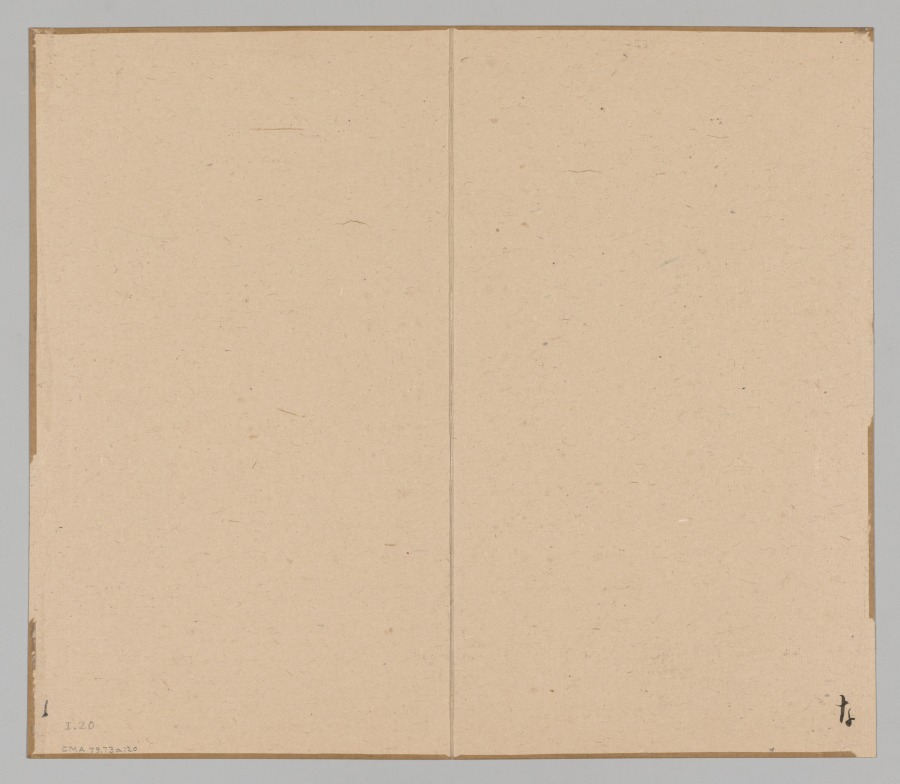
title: Reverberations of Taiga, Volume 1 (leaf 20)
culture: Japan, Edo period (1615–1868)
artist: Aoki Shukuya (Japanese, d. 1802)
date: mid- to late 1700s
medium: double-leaf from a pair of albums; ink and light color on paper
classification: Portfolio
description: Traditionally, young painters in Japan began their studies with an established master-painter. The master's compositions invariably became models that the apprentice copied to learn various ink and brush techniques. Shukuya was a pupil of the famous Kyoto artist Ikeno Taiga, whose style is reflected in these sketches of rocks, trees, and mountains.